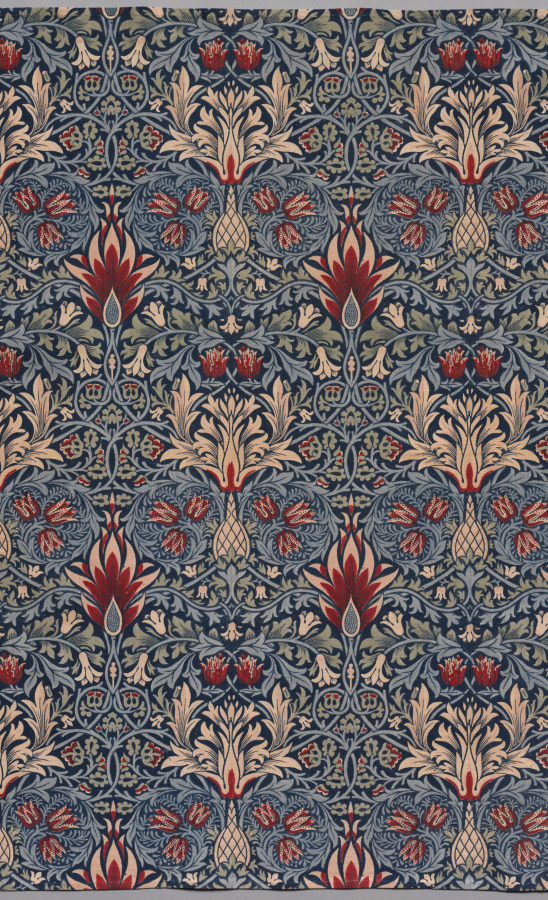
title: Snakeshead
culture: England, Walthamstow, Early 20th century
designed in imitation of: William Morris (British, 1834–1896)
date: Early 20th century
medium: plain weave cotton, printed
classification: Textile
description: When Morris designed Snakeshead in 1877, Indian silks were in style and widely imported from British India. This design stands out for its diminutive motifs and the strong red and black colors, which were fashionable only for a short time before paler hues regained favor with clients. While its color scheme suggests distant lands with warmer climates, the pattern showcases one of Morris’s favorite flowers: the fritillary, a wildflower that he remembered growing in the meadows near Oxford.